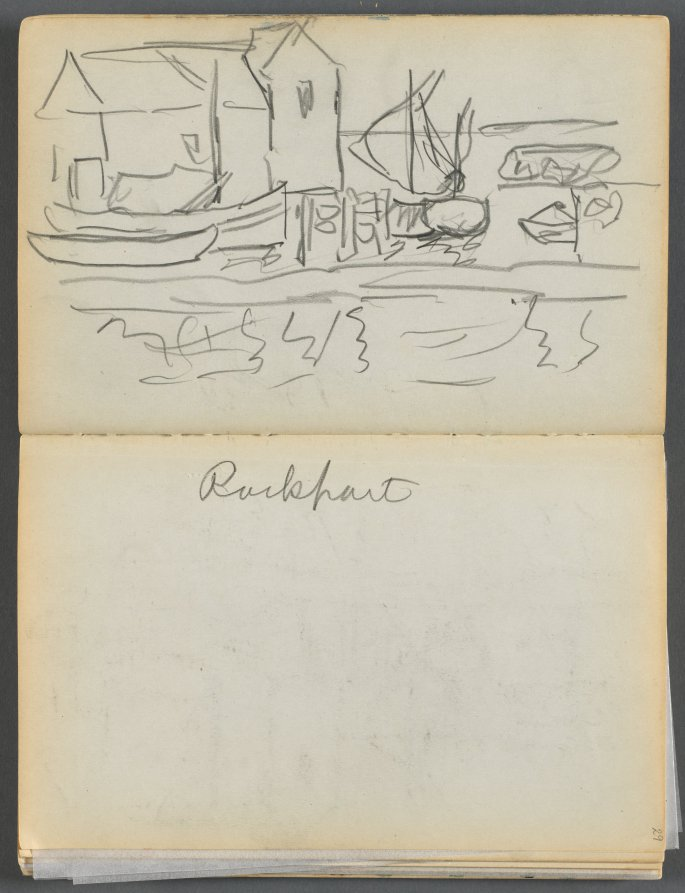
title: Sketchbook- The Granite Shore Hotel, Rockport, page 028 & 29: "Rockport"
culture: America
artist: Maurice Prendergast (American, born Newfoundland [now Canada], 1858–1924)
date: 1905–10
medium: graphite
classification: Bound Volume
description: This sketchbook contains 72 pages of pencil drawings and 9 watercolors of Cape Ann. On the inside of the cover Prendergast wrote the address of the Granite Shore Hotel in Rockport, Massachusetts.